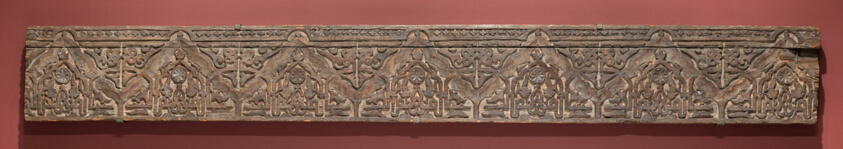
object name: Architectural fragment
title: Carved Wooden Panel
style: Islamic (culture or style)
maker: Morocco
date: Marinid dynasty (1244–1465), 14th century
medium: Carved Wood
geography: Morocco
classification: wood; architectural fragment; asian art